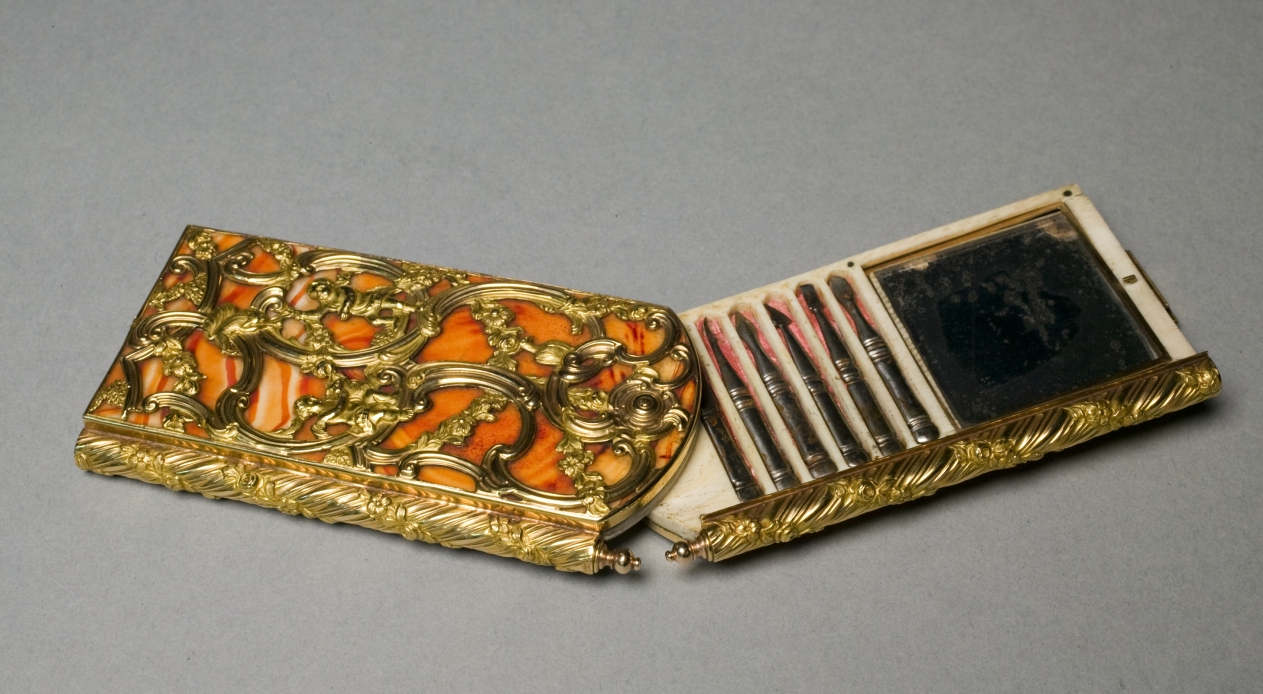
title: Writing Tablet (Aide-Mémoire)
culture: England, 18th century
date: c. 1760–70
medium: gold, agate, gold-mounted pencils, ivory writing tablets, mirror, manicure set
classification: Miscellaneous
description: Luxurious personal objects were an essential part of a privileged wardrobe during the 1700s and early 1800s, emphasizing their owner’s refinement and wealth. Jewelry, miniatures, and writing tablets were often given as intimate gifts, intended to be seen and admired. Their glittering surfaces, however, disguised a system based on the labor and suffering of enslaved people and the decimation of elephant populations across Africa. Throughout the 1700s and 1800s, the ivory and slave trades were closely intertwined, as indigenous people and elephant tusks were transported and sold along the same routes. Slavery was not abolished in much of the British Empire until 1833. Britain and other European nations continued to pursue colonialism with a sense of superiority that found its way into all aspects of life, including decorative objects glorifying their conquests.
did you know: During the 1700s, many wealthy women wrote personal notes on little thin sheets of polished ivory like this one and later wiped the tablet clean with a damp cloth.